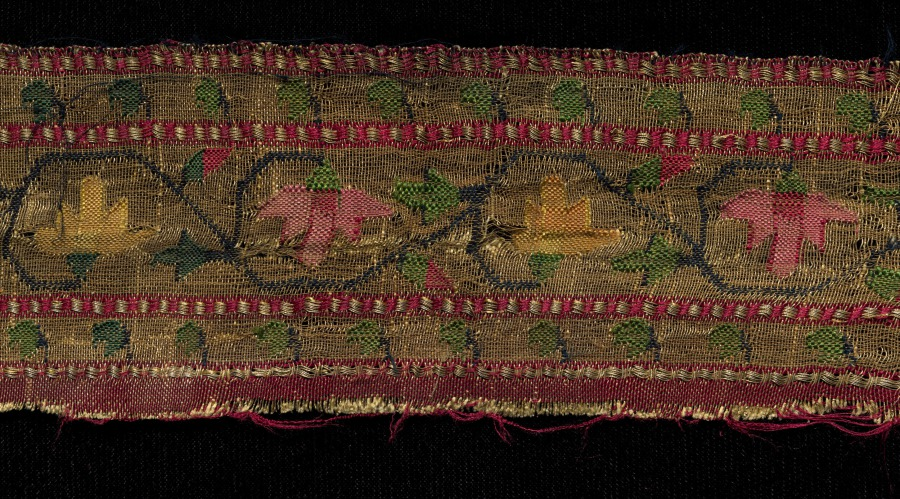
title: Strip of Border of Sari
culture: India, Aurangabad ?, 19th century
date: 1800s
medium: plain weave and tapestry weave: silk and metal thread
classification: Textile